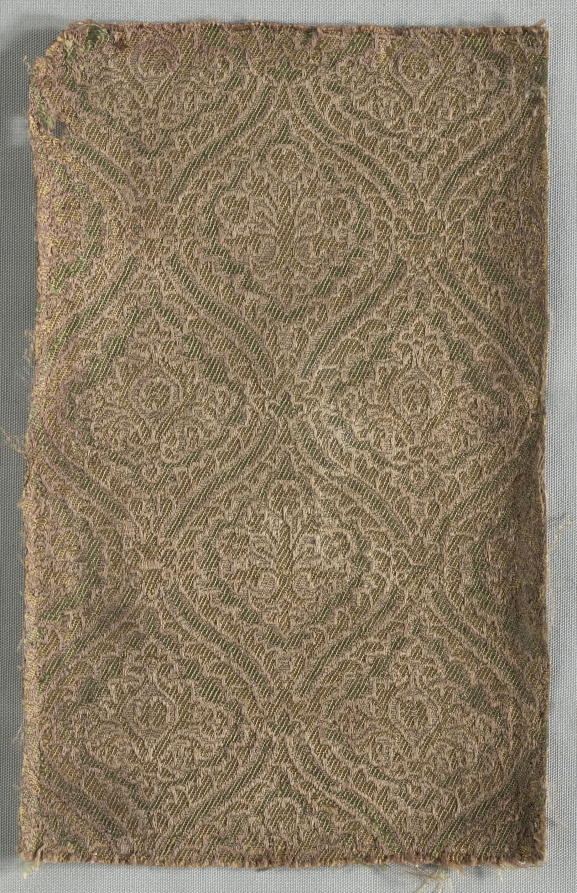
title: Two Brocaded Fragments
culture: Italy, late 16th century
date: late 1500s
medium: lampas weave (?), silk and metal thread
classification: Textile